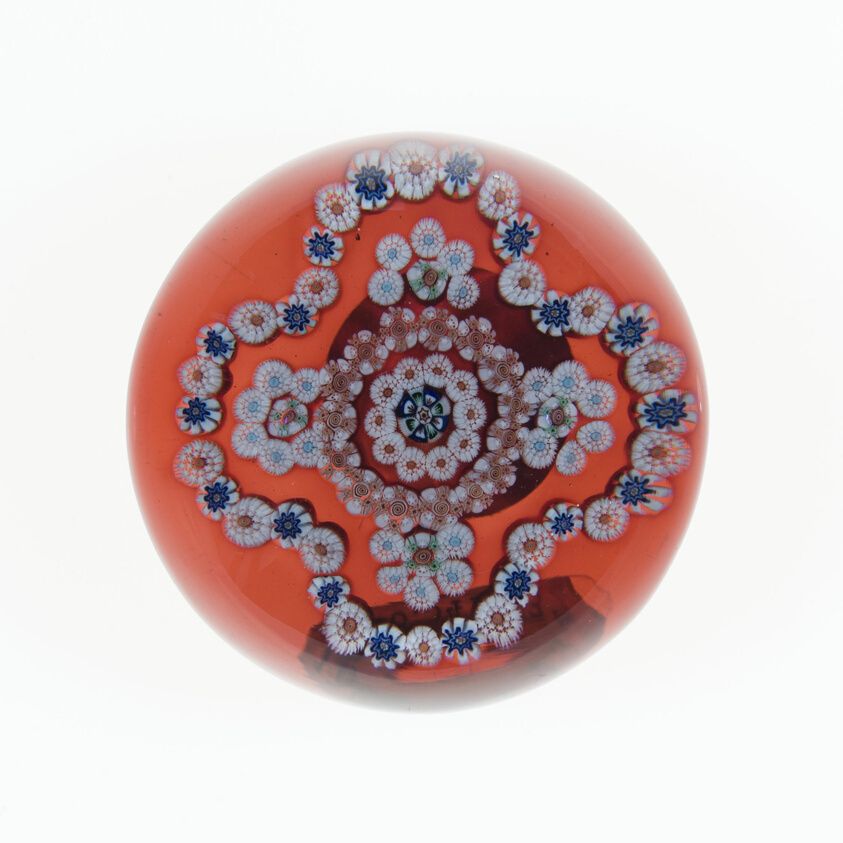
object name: Glass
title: Paperweight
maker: Baccarat Glassworks (Cristalleries de Baccarat); Lorraine, France, founded 1764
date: c. 1845–60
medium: Glass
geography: Baccarat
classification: paperweight; glass